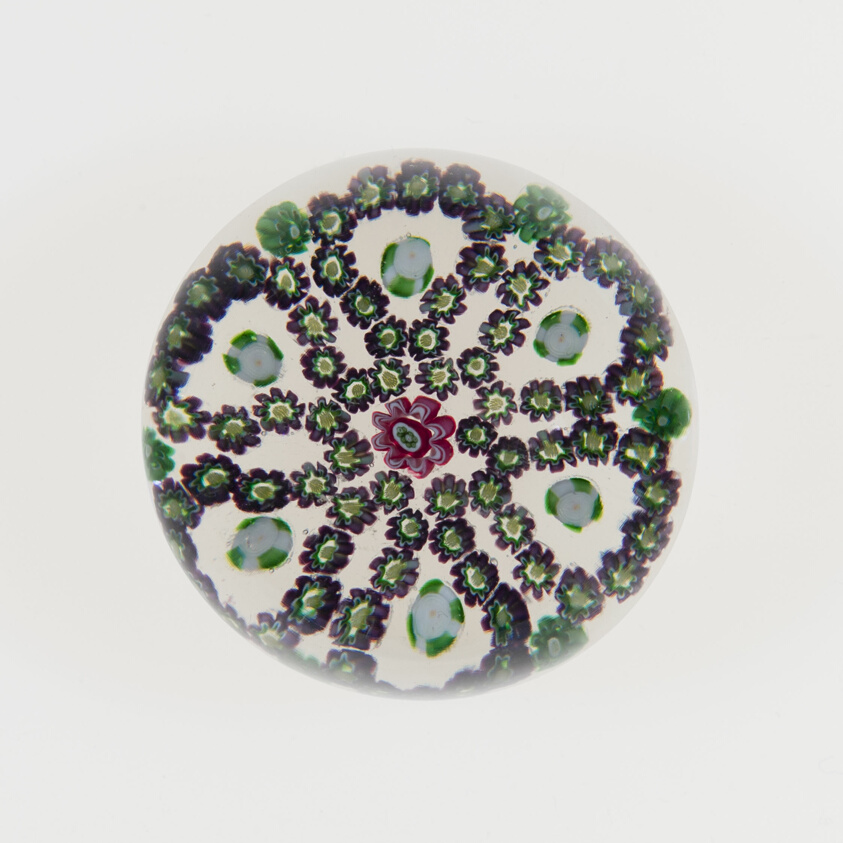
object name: Glass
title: Paperweight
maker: Clichy Glassworks (Cristalleries de Clichy); Clichy, France, 1837-1885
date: 19th century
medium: Glass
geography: Clichy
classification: paperweight; millefiori; european decorative arts; glass